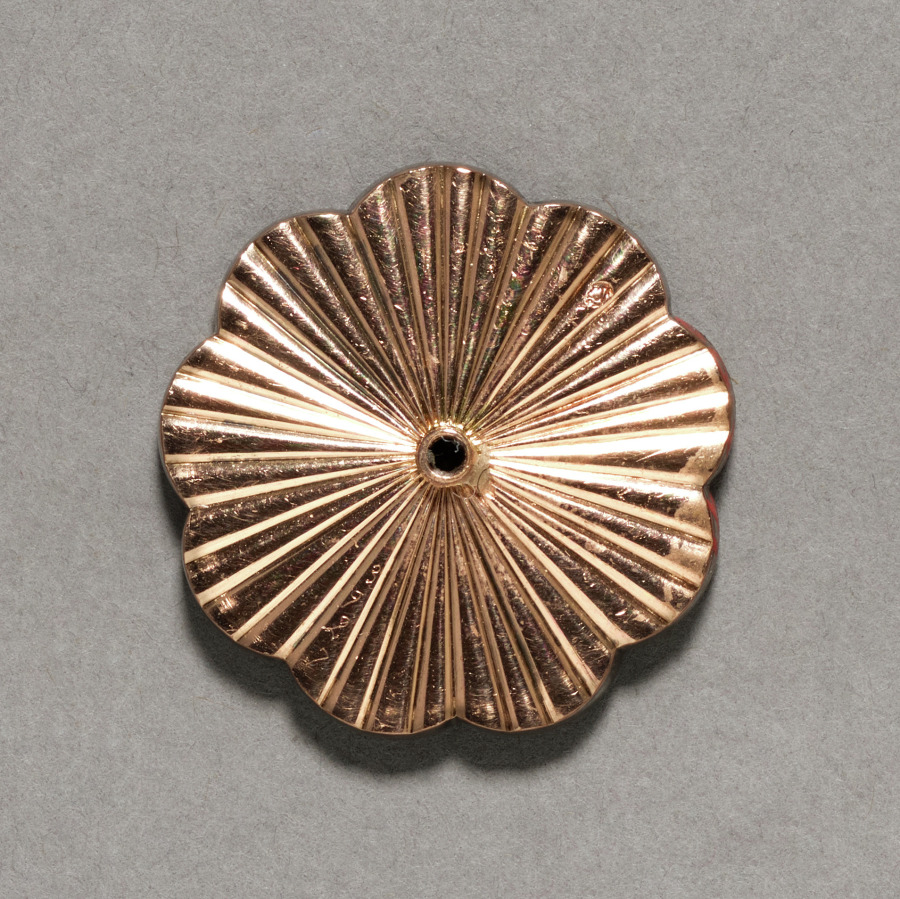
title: Button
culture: Russia, St. Petersburg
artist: firm of Peter Carl Fabergé (Russian, 1846–1920)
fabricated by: August Wilhelm Holmström (Russian, 1929–1903)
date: after 1896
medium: gold, enamel, diamonds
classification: Miscellaneous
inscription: inscribed: double-headed eagle; Fabergé; St. Petersburg, Moscow (all in Cyrillic; inside lid of box).